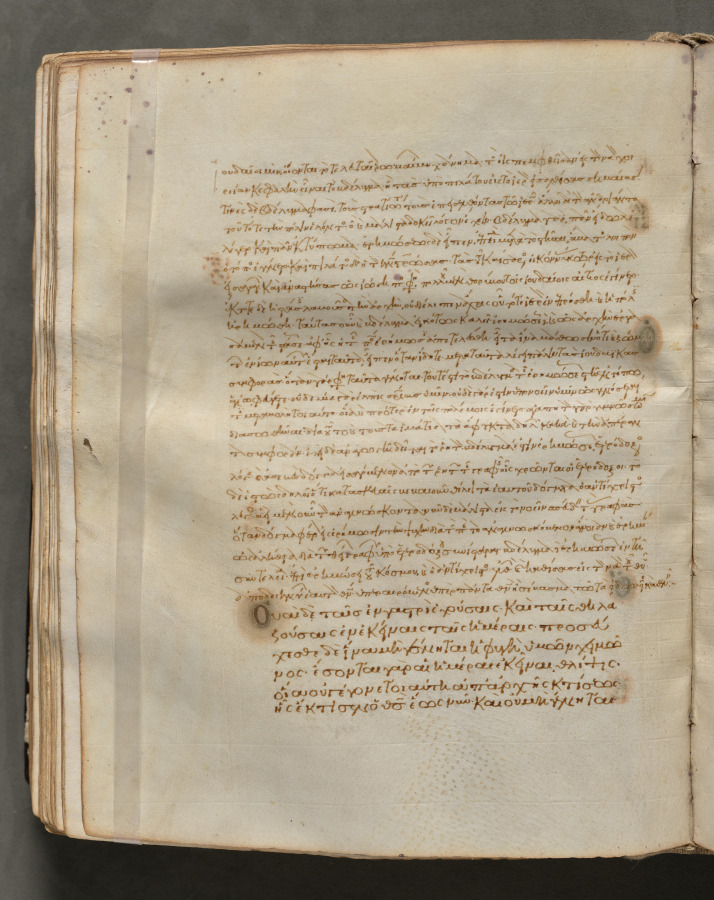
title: Text, folio 182 (verso), from a Gospel Book with Commentaries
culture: Byzantium, Constantinople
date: c. 1000–1100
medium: ink, tempera, and gold on vellum; leather binding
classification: Bound Volume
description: Each of the four gospels in this book opens on a page with brilliantly illuminated borders depicting the author of the text as well as birds-principally peacocks, symbols of the immortality of the soul-and fountains, representing the fountain of life and the salvation of the soul. This volume consists of 428 leaves with texts in Greek. Its level of sophistication suggests that it was probably written and decorated in a monastery in Constantinople.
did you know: Gospel Books were carried in procession through Byzantine churches.